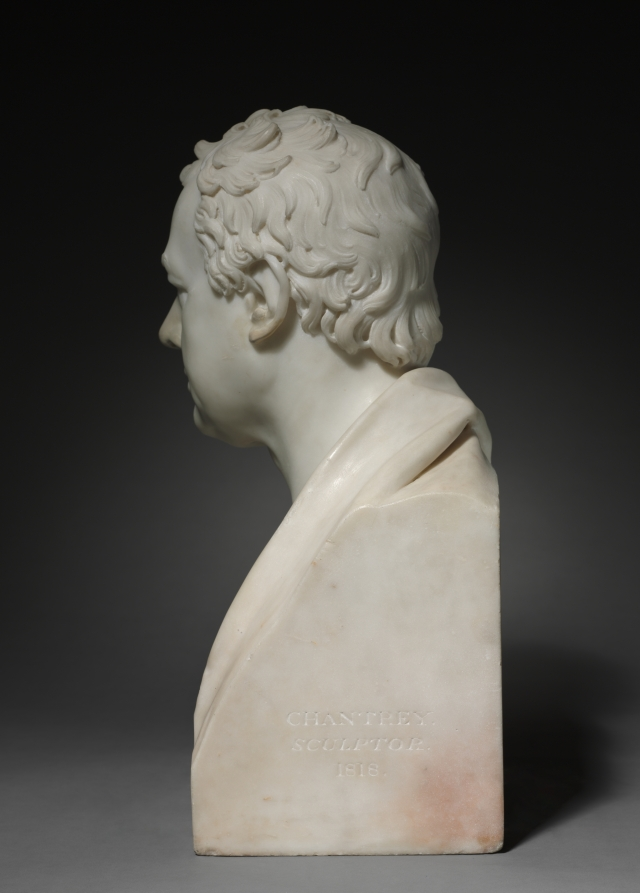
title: Sir H. C. Englefield, Bart.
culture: England, 19th century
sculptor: Francis Legatt Chantrey (British, 1781–1841)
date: 1818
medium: marble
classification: Sculpture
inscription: inscribed left side: Chantrey/Sculptor/1818; rear: Sir H. C. Englefield, Bart.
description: To modern eyes, a bare-chested portrait of a man in his mid-60s might seem undignified. However, it was fashionable for gentlemen of Englefield’s generation to be portrayed in this manner, deliberately referencing the antique sculptures of Roman statesmen they admired. As a Catholic, Englefield was barred from taking part in politics in England; however, he was a member of several clubs devoted to the amateur study of art, science, and history. Among these were the Society of Dilettanti, which championed the works of antiquity and promoted the creation of modern art in the same spirit—like this marble bust by celebrated sculptor Francis Legatt Chantrey.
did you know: Initially, Chantrey tried to establish himself as a portrait painter. After 1805, he painted only on occasion and from 1811–20, he became the leading portrait sculptor in Regency Era Great Britain.